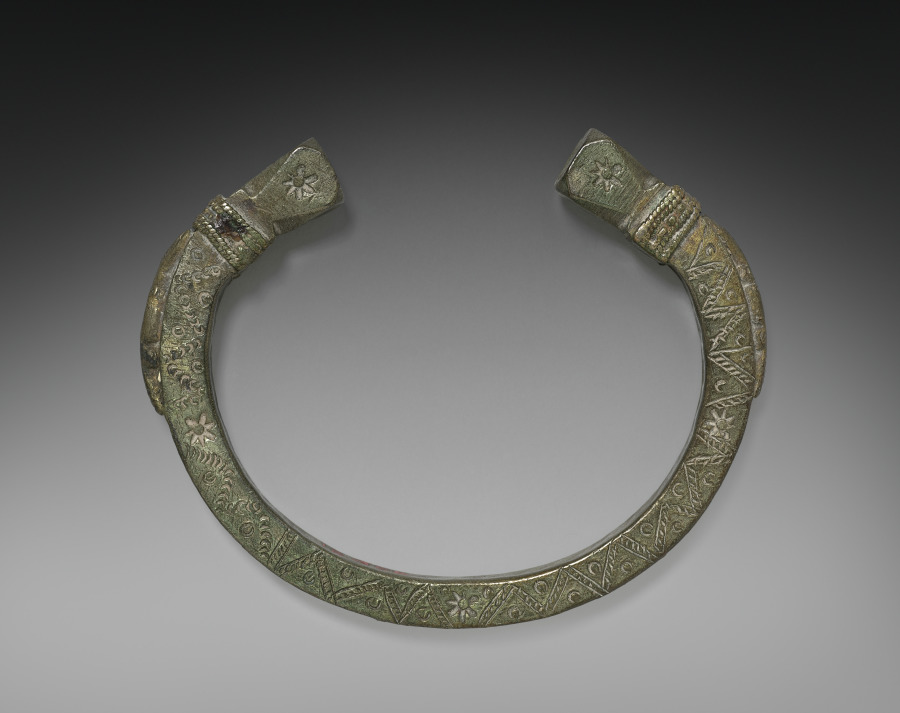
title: Anklet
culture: India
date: 1800s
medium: silver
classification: Jewelry